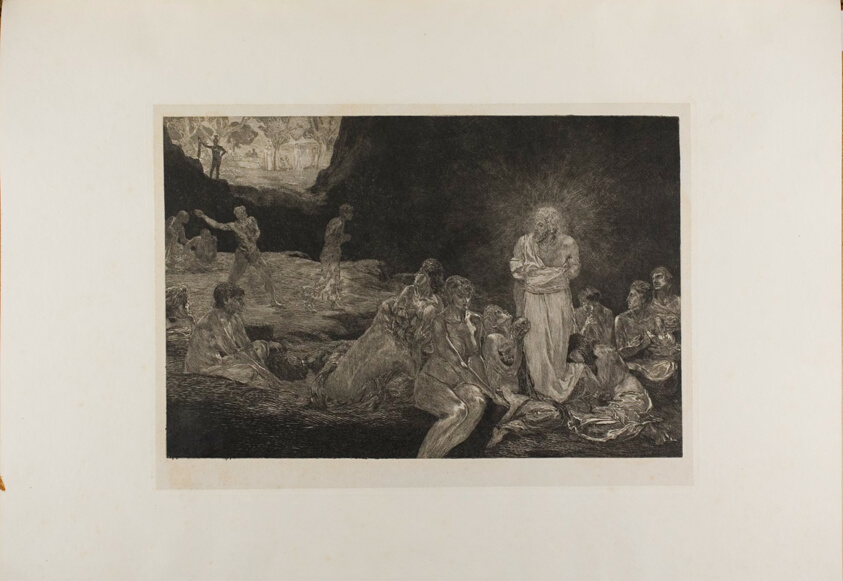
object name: Print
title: Christ and the Women Sinners, plate thirteen from A Life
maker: Max Klinger (German, 1857-1920); printed by Otto Felsing (German, 19th century)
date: 1884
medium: Etching and aquatint on ivory China paper, laid down on cream laid paper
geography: Germany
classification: etching; print; prints and drawing